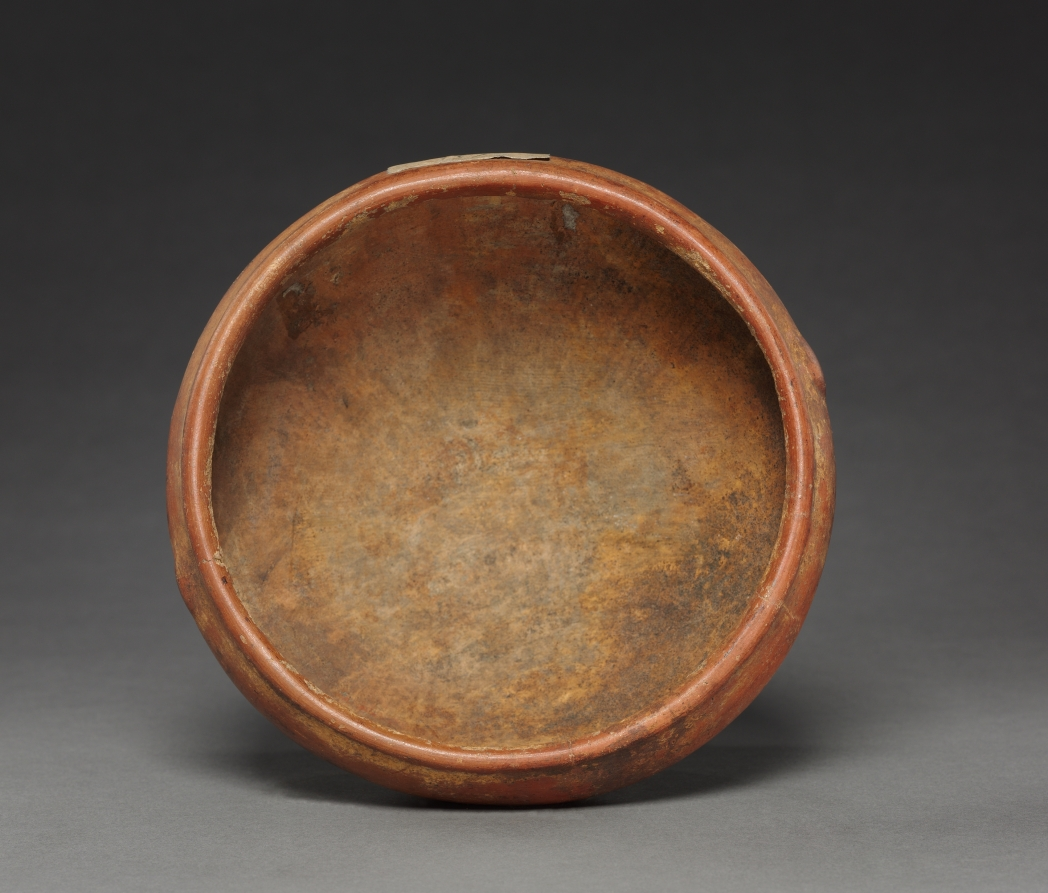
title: Vase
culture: Colombia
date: before 1550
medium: red ware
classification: Ceramic